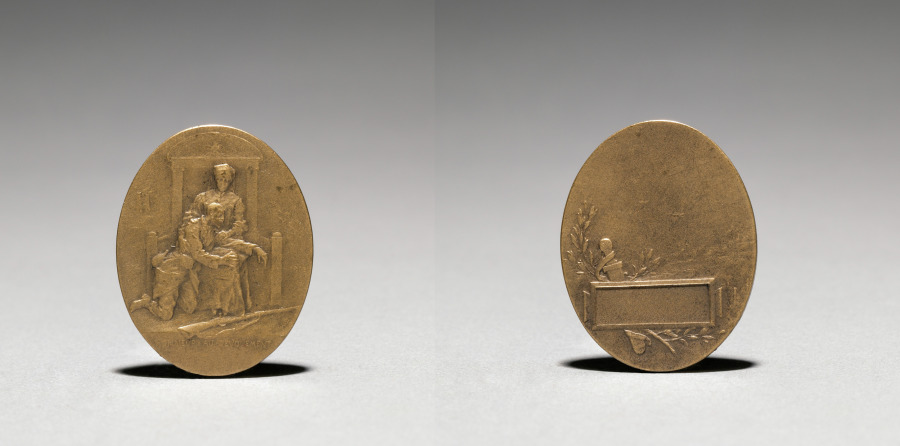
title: Medallion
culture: France, 19th-20th century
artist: Jean Paul Aube (French, 1837–1916)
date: 1915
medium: bronze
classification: Metalwork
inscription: "Honneur au devouement" (honor to self sacrifice); inscribed: "P. Aube."